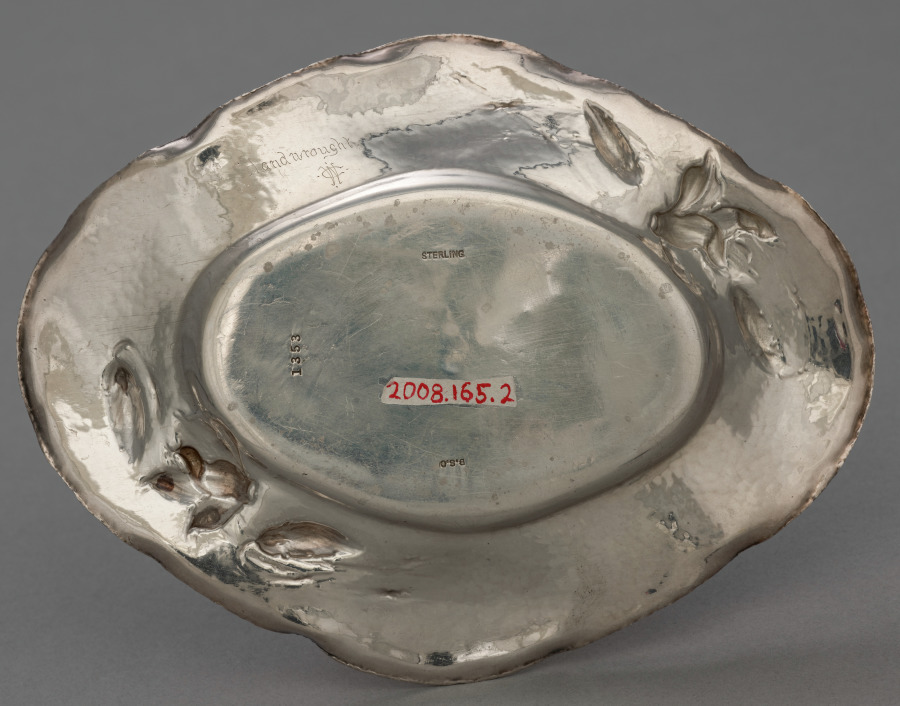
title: Sauce Boat and Tray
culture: America, Rhode Island, 19th century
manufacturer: Barbour Silver Company (American)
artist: attributed to William Christmas Codman (British, 1839–1921)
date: c. 1890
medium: silver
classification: Silver